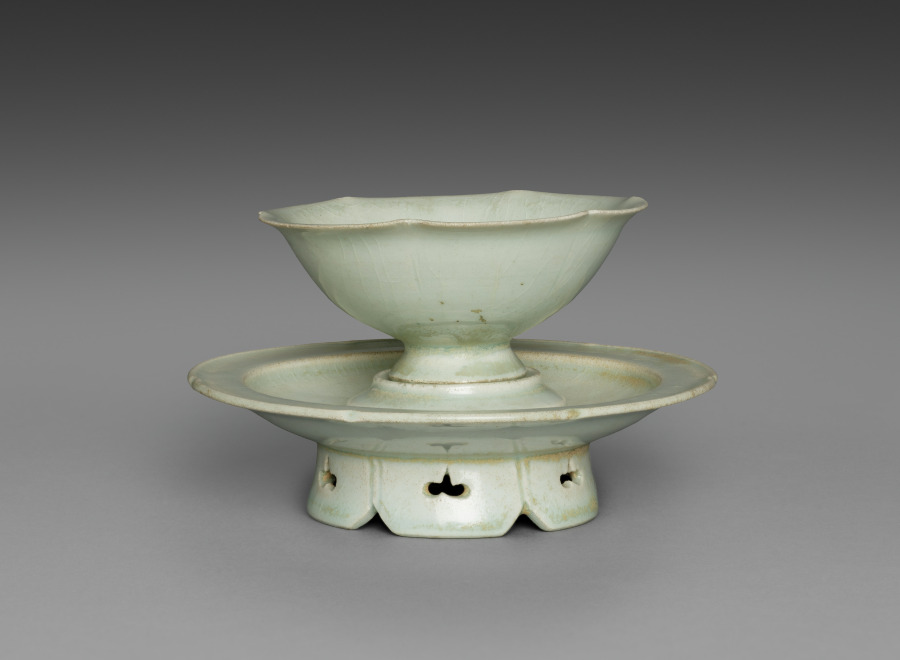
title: Cup and Stand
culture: China, Jiangxi province, Jingdezhen, Southern Song dynasty (1127-1279)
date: 1100s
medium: Porcelain with pale bluish-white glaze, qingbai ("blue-white") ware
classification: Ceramic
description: The kilns of Jingdezhen in Jiangxi province produced an extremely delicate porcelain made from the local resources of kaolin (white China clay) and petuntse (a feldspathic rock called china stone). It is glazed with a clear bluish-white glaze, thus the name qingbai (blue-white) or yingqing (shadowy blue) for this type of ware.